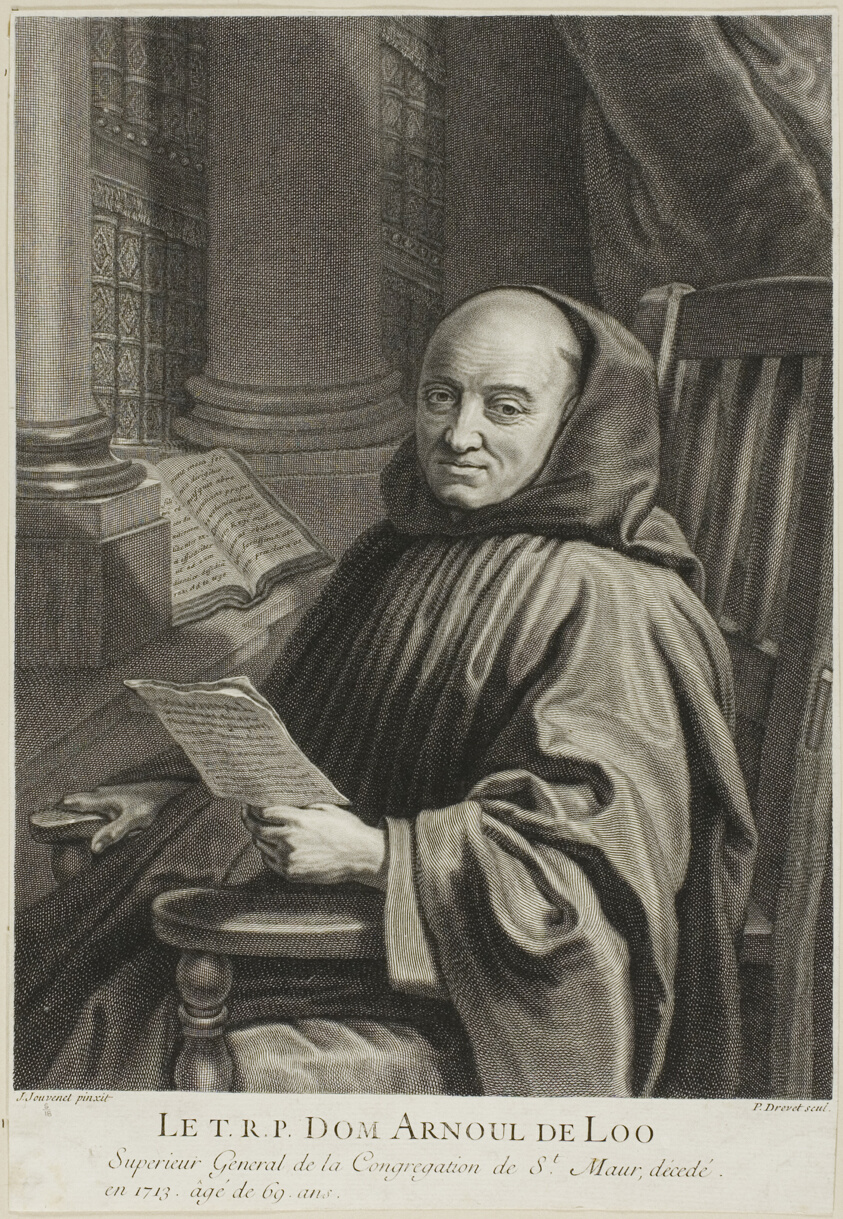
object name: Print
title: Portrait of Father Arnoul de Loo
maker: Pierre-Imbert Drevet (French, 1697-1739); after Jean-Baptiste Juvenet III (French, 1644-1717)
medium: Engraving on ivory laid paper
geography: France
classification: engraving; print; prints and drawing